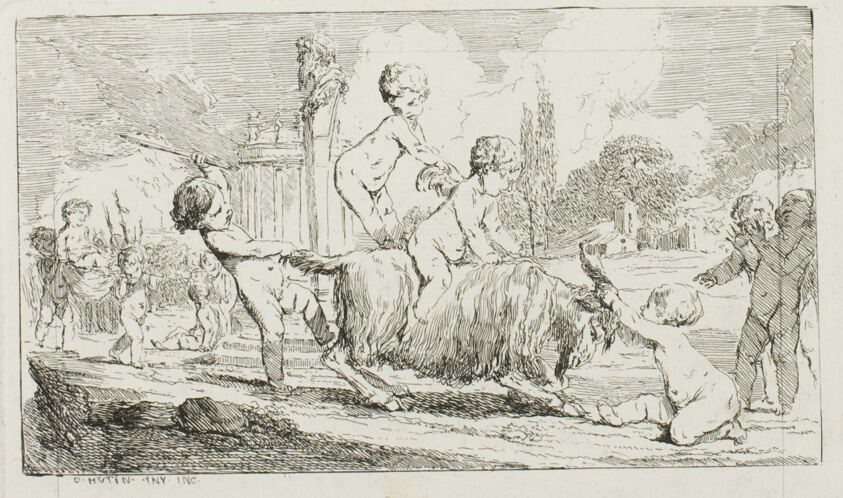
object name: Print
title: Children Playing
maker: Charles-François Hutin (French, 1715-1776)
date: 1764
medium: Etching in black on off-white laid paper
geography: France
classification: etching; paper; print; prints and drawing